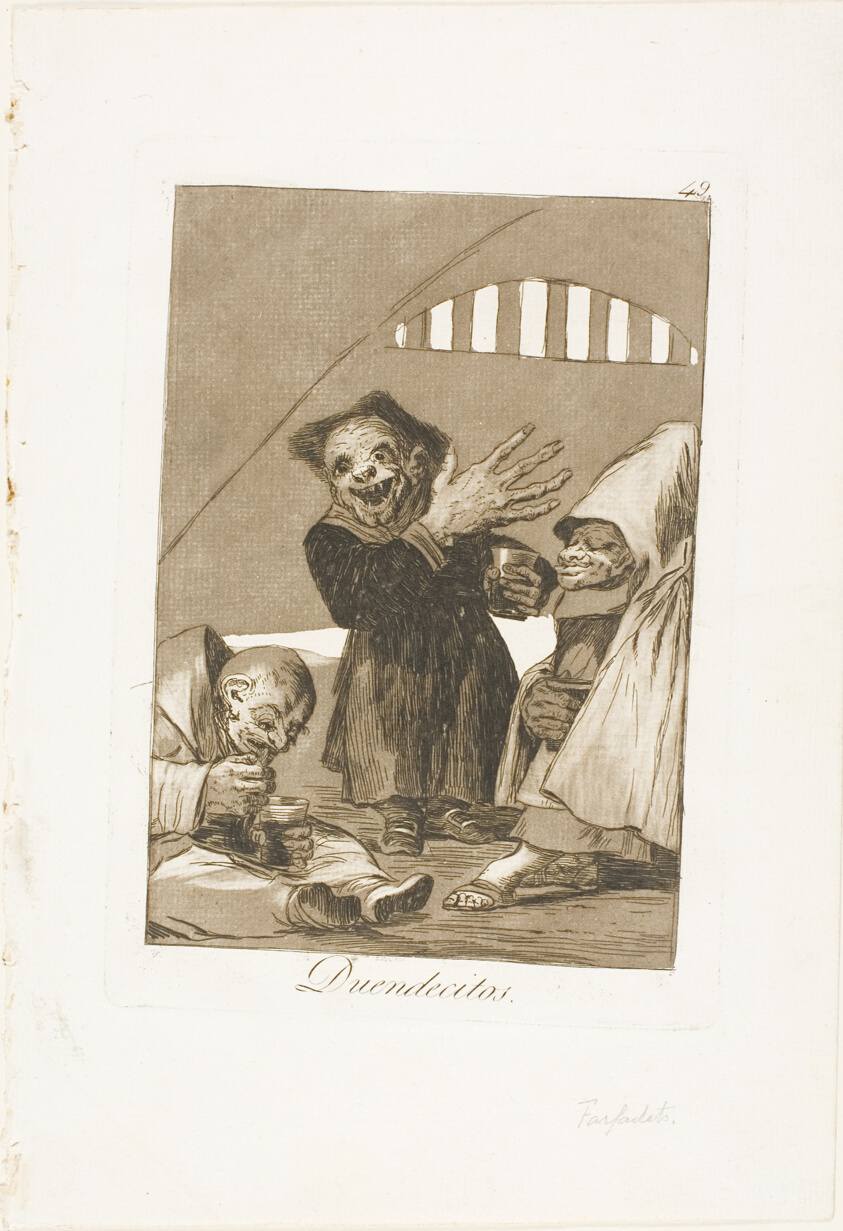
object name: Print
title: Hobgoblins, plate 49 from Los Caprichos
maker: Francisco José de Goya y Lucientes (Spanish, 1746-1828)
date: 1797/99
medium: Etching and aquatint on ivory laid paper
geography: Spain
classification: etching; print; prints and drawing